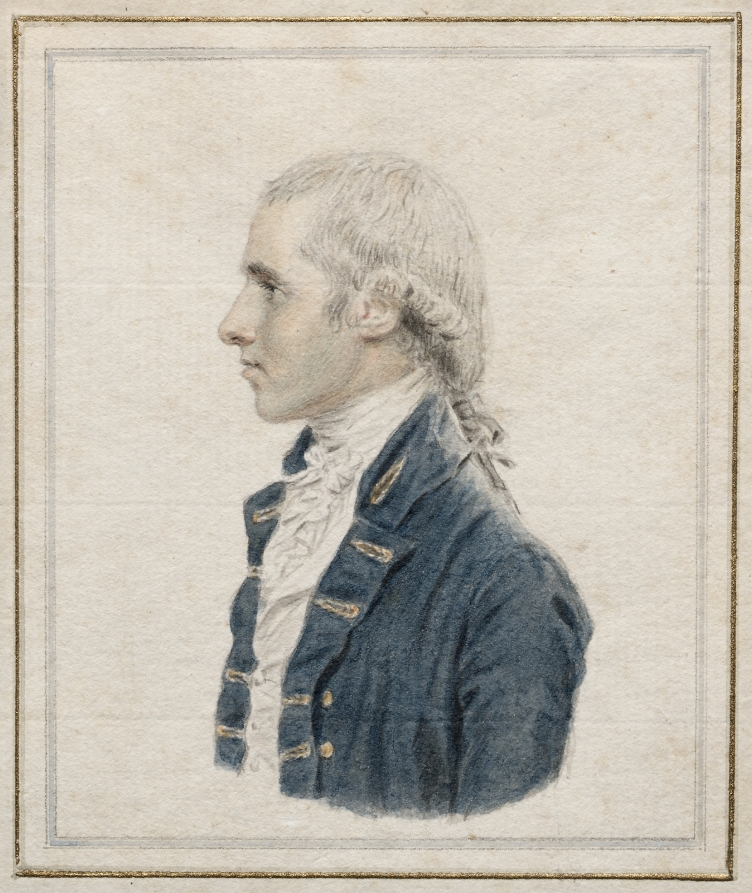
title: Portrait of Sir Captain West of the Dutton Indiaman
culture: England, 18th century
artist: John I Smart (British, 1741–1811)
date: 1785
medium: watercolor over traces of black chalk, with metallic gold paint on laid paper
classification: Portrait Miniature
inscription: by artist, across bottom, in brown ink: Captain West of the Dutton Indiaman 1785 / drawn on board going to Madras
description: Smart painted Captain West’s head in profile, turned to the right. His powdered hair is worn en queue with curls above his ears and white powder on his shoulders. He has long eyelashes, parted lips, and a grayish cast to his skin tone, particularly over his beard. West dons a blue coat with gold buttonholes embroidered in gold and a white waistcoat, high collar, and cravat tied in a small bow. This work is a finished drawing by Smart, evidenced in part by its larger size and by the fact that the painting of the sitter’s clothing is complete and the bust is placed within an elaborate border comprised of blue, metallic gold, and gray lines. This finished quality does not preclude the possibility that the drawing may also have functioned as a preparatory sketch for a miniature on ivory, which has not been located. Captain James West sailed the Dutton Indiaman from England to Madras, India, on several occasions, including Smart’s voyage in 1785. At least one of the sons of British judge Sir Elijah Impey was traveling with Smart on his journey to India and had his portrait taken by the artist. Another of Impey’s sons wrote of an earlier return passage to England made with Captain West in 1784, shedding light on the sea captain’s character and disposition. Impey’s account conveys not only West’s personality but the atmosphere that prevailed on the ship over which the captain presided and on which Smart traveled and worked. As indicated by an inscription in the artist’s hand, this portrait was painted by Smart while he was aboard the Dutton en route to Madras and probably retained by the artist as a memento. In addition to the portrait of “Master Impey,” Smart is known to have taken the likeness of other figures while aboard the Dutton, including the quartermaster “Baker” and a French ship called the Consalateur, which was intercepted by the Dutton while sailing to India. The current location of both works is unknown.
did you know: In 1784 it was written that "Captain James West, had the just reputation of being a first-rate mariner, a well-informed, and thoroughly practical man of business, and in every way worthy of confidential intimacy."